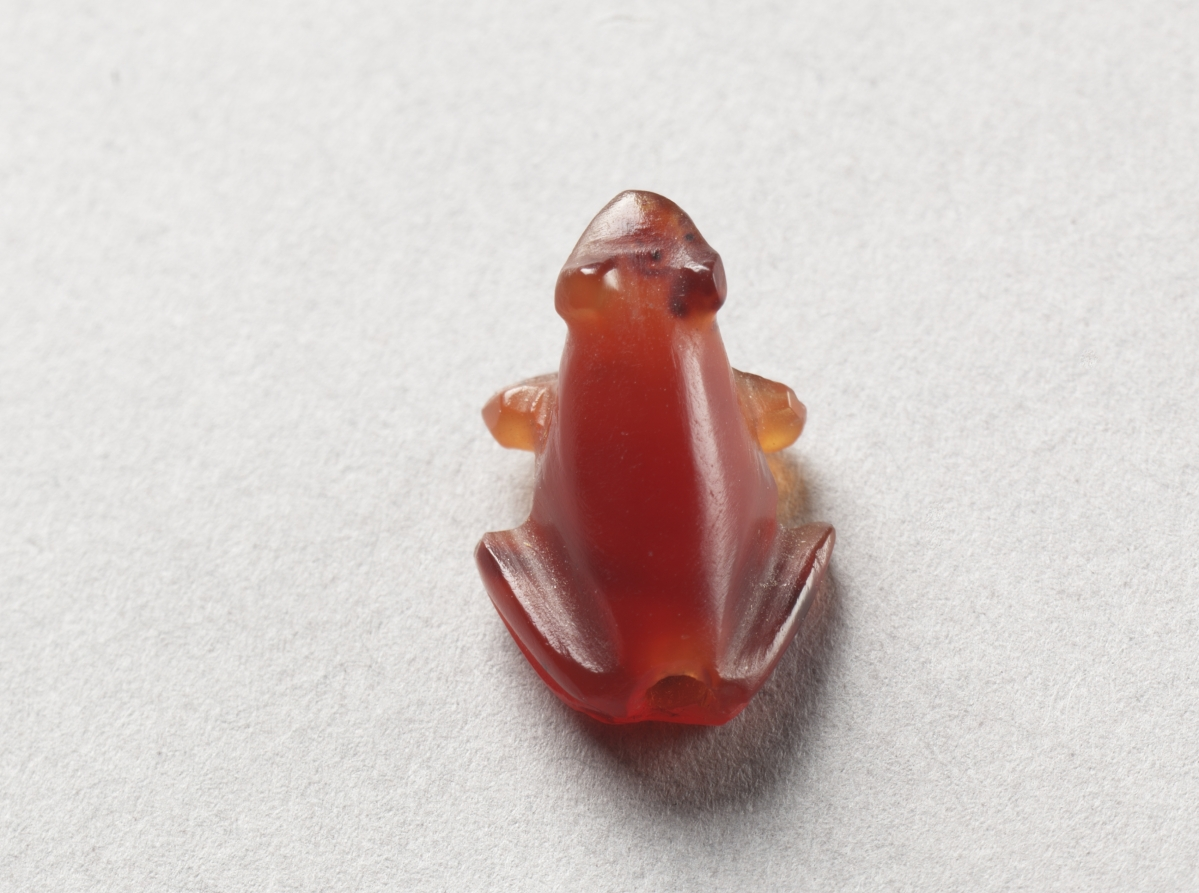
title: Frog Amulet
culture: Egypt, New Kingdom (1540–1069 BCE), Dynasty 18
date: c. 1540–1296 BCE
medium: carnelian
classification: Amulets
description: The frog, because of its numerous offspring, was a symbol of fertility. In fact, the hieroglyphic sign for 100,000 was a tadpole. Frog amulets were very popular both in semiprecious stone and in faience, and were worn by women hoping for an easy delivery. Both sexes wore the frog in expectation of a successful rebirth in the afterlife.